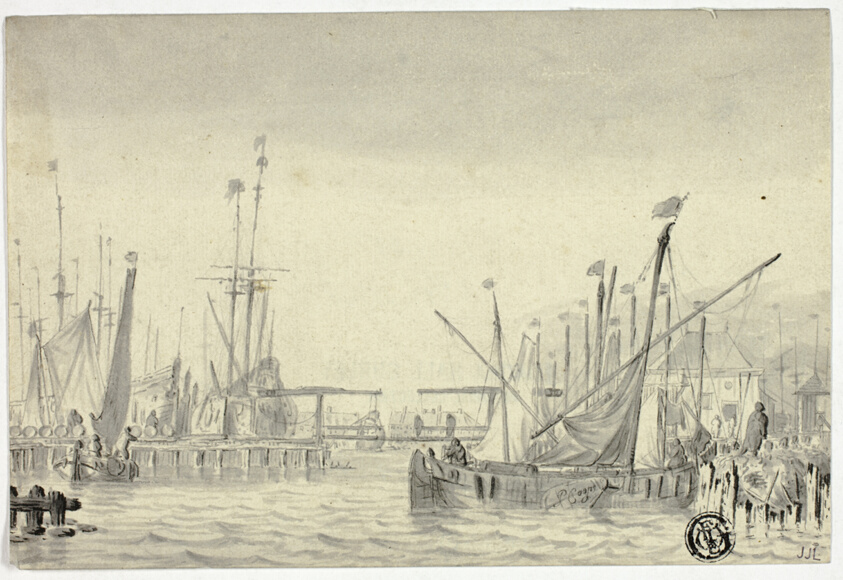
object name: Drawing and Watercolor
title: Ships in Harbor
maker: Pieter Coopse (Dutch, active 1668-1677)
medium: Pen and gray ink, with brush and gray wash, over traces of graphite, on ivory laid paper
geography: Holland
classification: ink or chalk wash; drawings (visual works); prints and drawing